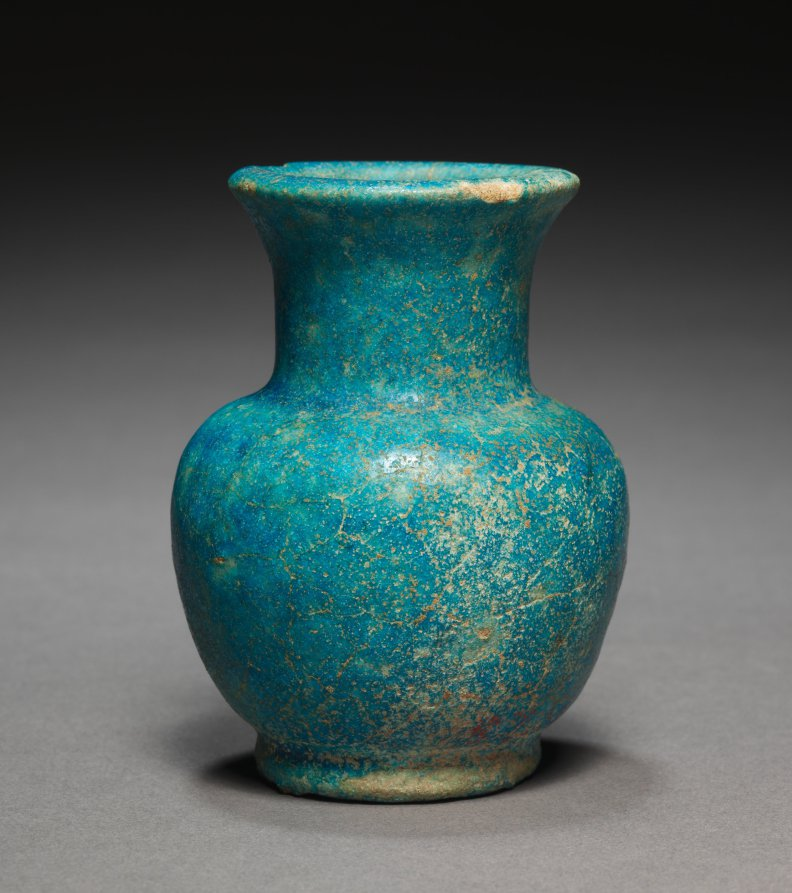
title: Jar with Tall Neck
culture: Egypt, Greco-Roman period (332 BCE–395 CE), Roman empire (30 BCE–395 CE)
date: 30 BCE–395 CE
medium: blue faience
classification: Vessels